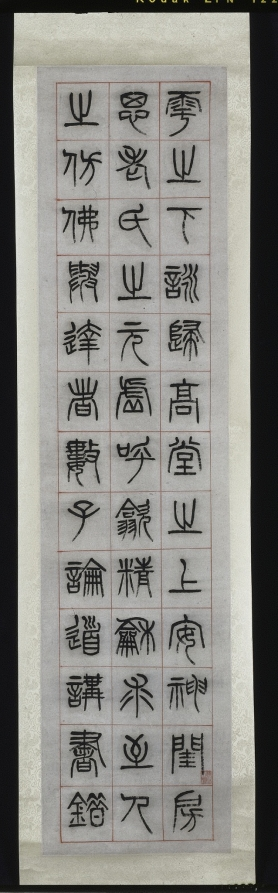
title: On Happiness, Calligraphy in Seal Script Style (zhuanshu)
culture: China, Changsu, Qing dynasty (1644-1911)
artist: Yang Yisun (Chinese, 1813–1881)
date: 1871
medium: hanging scroll, ink on paper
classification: Painting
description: Yang Yisun transcribed this ancient text on six narrow scrolls, starting at the top right and ending at the bottom left. Yang emphasizes the text’s historic nature by using the seal script style found on stone steles and bronze vessels. On Happiness features reflections of a scholar on a leisurely life in the countryside, composed by Han dynasty official Zhongchang Tong, who died the year the Han dynasty collapsed (AD 220). The idyllic life described in the text may bean evocation of the past in a time of national crisis. A decade before Yang wrote these scrolls, Anglo-French forces had looted and burned the Summer Palace in Beijing. At the same time, the domestic Taiping rebellion (1850–64), led by a religious fanatic to overthrow the Qing government, had devastated Yang’s homeland, the Jiangnan region, with an estimated 20 million lives lost.